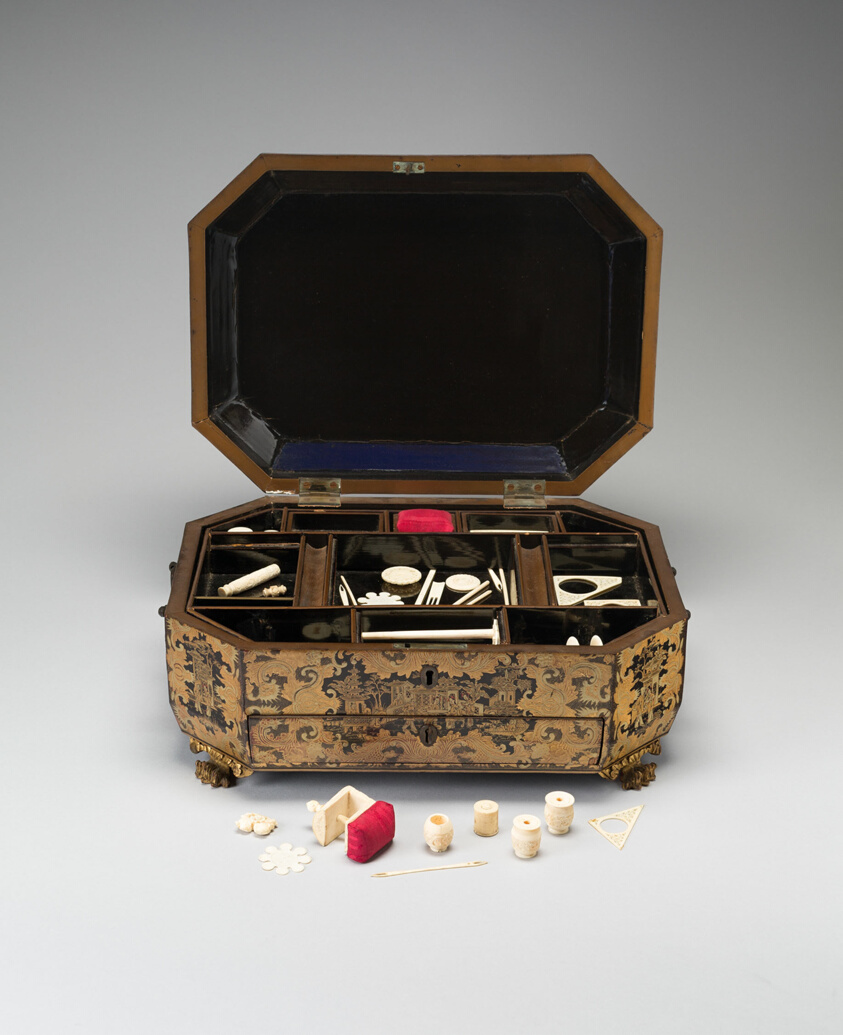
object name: Decorative Arts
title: Work Box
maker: China, for the European market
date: Early to mid 19th century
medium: Lacquered wood, gilt metal, ivory, and silk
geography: China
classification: wood; european decorative arts; decorative arts